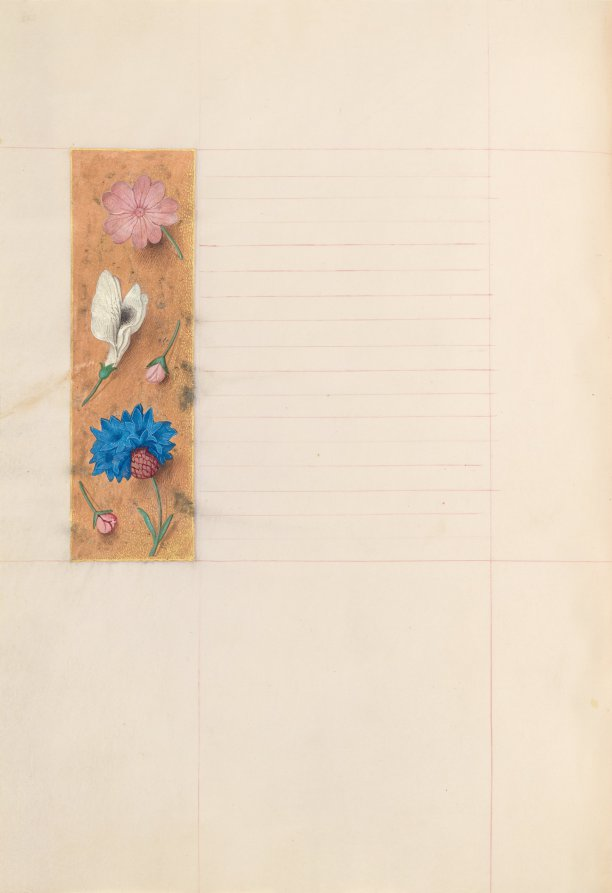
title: Hours of Queen Isabella the Catholic, Queen of Spain: Fol. 272v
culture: Flanders, Ghent and Bruges, late 15th century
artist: Master of the First Prayerbook of Maximillian (Flemish, c. 1444–1519)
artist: and Associates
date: c. 1500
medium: ink, tempera, and gold on vellum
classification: Bound Volume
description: This manuscript was illuminated by a circle of at least five highly organized manuscript painters active in the Flemish cities of Ghent and Bruges. The principal illuminator was Alexander Bening, who painted the majority of the book's miniatures. Manuscripts produced by this circle of artists are renowned for the decoration of their borders, which typically feature a rich variety of realistically-painted flowers, birds, and butterflies. This prayer book, called a book of hours, was intended not for a cleric, but for the private devotions of a lay person-in this case, Isabella the Catholic, Queen of Spain (1451-1504). Isabella's coat of arms embellishes the book's frontispiece. It is unlikely that the book was commissioned by the Queen herself; rather, she probably received it as a diplomatic gift from someone courting her patronage, perhaps Cardinal Francisco Jimenez de Cisneros. A Franciscan friar, Jimenez was dependent upon Isabella for his advancement, first to the post of Queen's confessor in 1492, and then to Archbishop of Toledo in 1495.